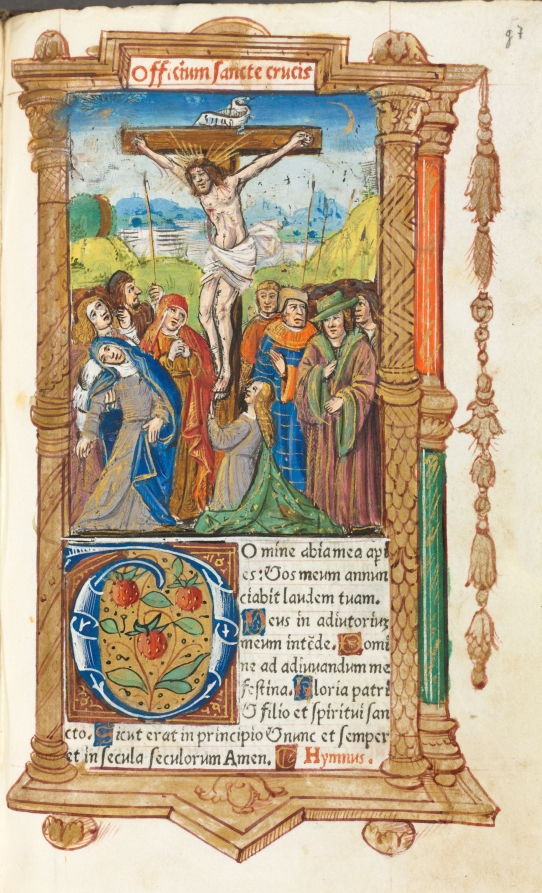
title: Printed Book of Hours (Use of Rome): fol. 55r, The Crucifixion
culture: France, Paris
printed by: Guillaume Le Rouge (French, Paris, active 1493–1517)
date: 1510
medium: 112 Printed folios on parchment, bound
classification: Bound Volume